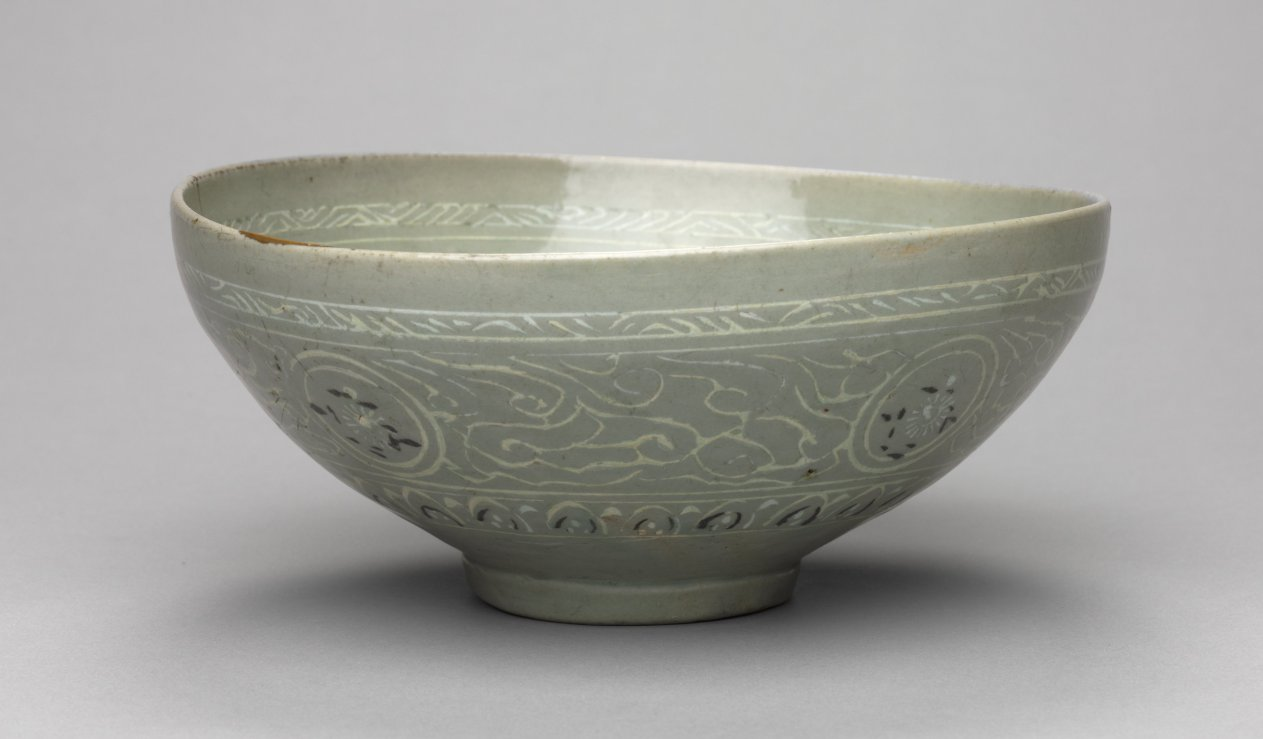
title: Bowl with Inlaid Cranes and Clouds Design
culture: Korea, Goryeo dynasty (918–1392)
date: 1200s-1300s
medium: pottery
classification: Ceramic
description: As early as the seventh century, the practice of drinking tea and wine became an important part of elite leisure culture in Korea. A wide bowl like this example was especially suitable for drinking powdered tea shaved from a compressed tea cake, the most commonly enjoyed type during the Goryeo period. The image of flying cranes amid clouds that decorate the inner wall of this tea bowl is considered an auspicious sign particularly about the king's good governance.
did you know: An actual event in 1121, which constitutes a groups of cranes hovering above the palace in Kaifeng, the capital of the Chinese Northern Song dynasty, soon became internationally recognized as a heavenly sign about the ruler's virtuous governance.